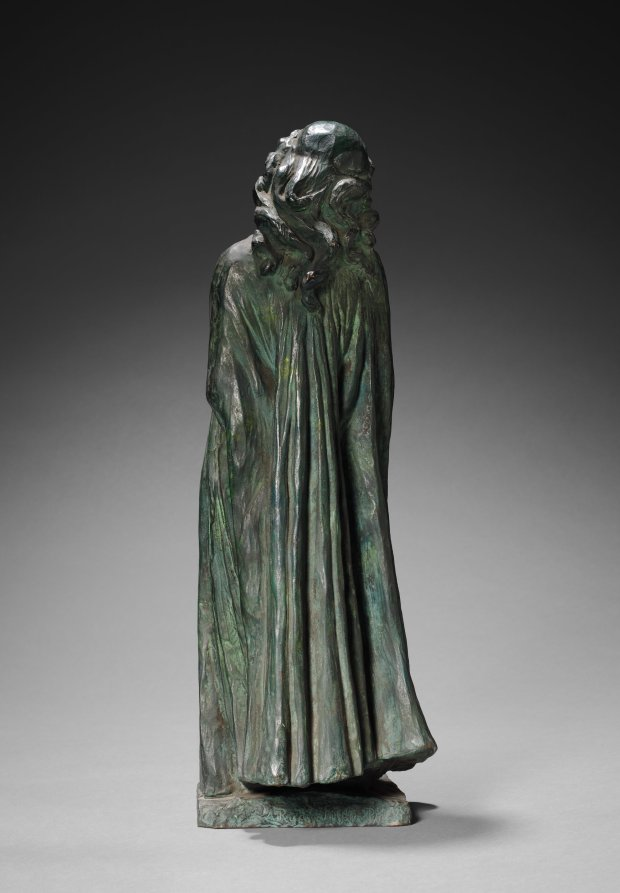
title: Loïe Fuller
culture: France, 19th-20th century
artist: Pierre Roche (French, 1855–1922)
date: c. 1900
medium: bronze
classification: Sculpture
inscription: Inscribed on the face of the base: "Loïe Fuller" and at the right, signature of the artist